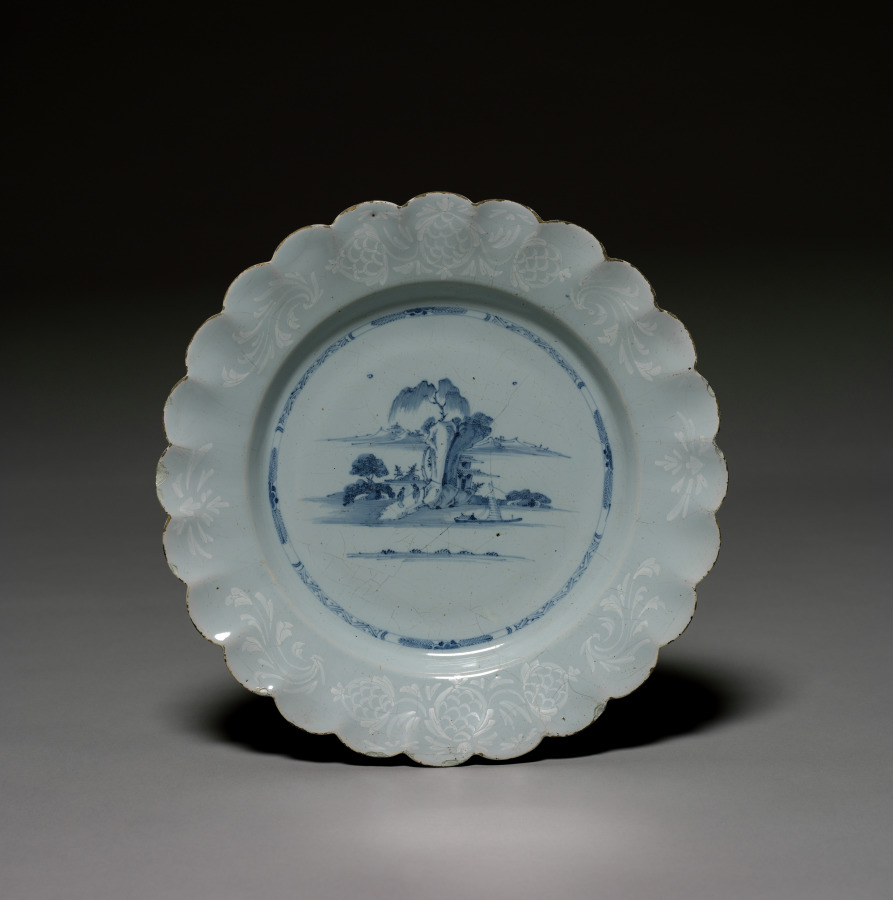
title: Plate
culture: England, 18th century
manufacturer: Bristol Porcelain Factory (British, 1770–82)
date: mid-1700s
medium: earthenware (delft ware)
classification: Ceramic